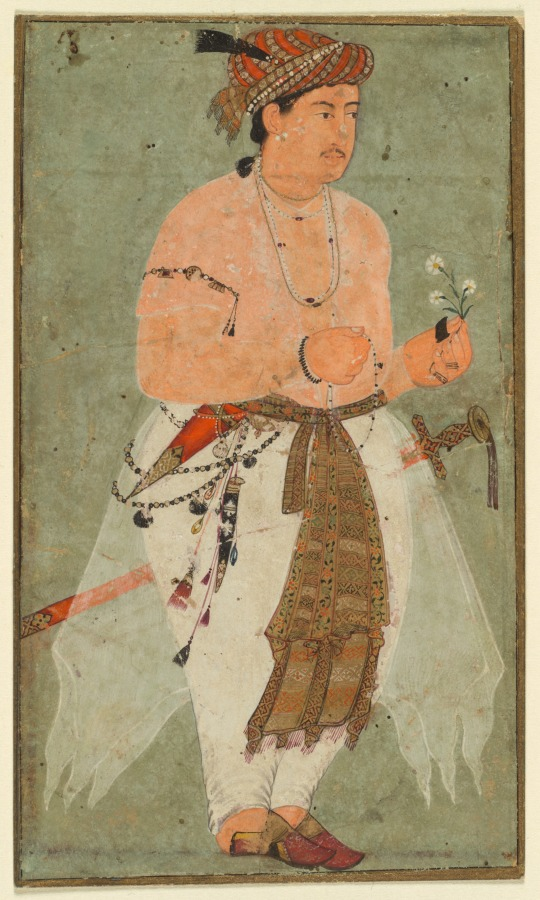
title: A Mughal Prince, Perhaps Danyal, Holding a Sprig of Flowers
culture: Mughal India, court of Akbar (reigned 1556–1605)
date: c. 1580–90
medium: Gum tempera and gold on paper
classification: Painting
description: Prince Danyal (1527–1605), the emperor Akbar’s youngest son, is said to have been his favorite. Danyal served his father as a military officer, leading contingents to the Deccan plateau in southern India, until he succumbed to an untimely death of alcoholism; Akbar himself died later that year. Here, Danyal wears the thumb ring of an archer and grasps a white flower in his hand, recalling his epithet, Nosegay of Fortune’s Spring. In his right hand he holds prayer beads. A sword, knife, and dagger hang from his sash. This early Mughal portrait depicts him as he appeared in his mid-teens.